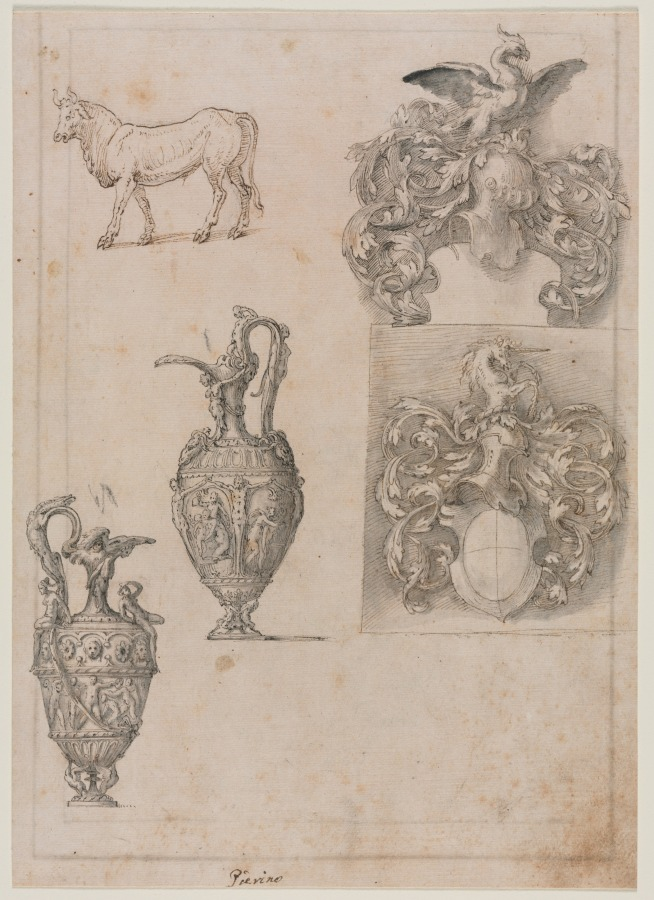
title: Design for Two Vases, Two Coats of Arms, and a Bull (recto) Several Line Borders (verso)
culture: Italy, 16th century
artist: Luzio Romano (Italian, active 1528–75)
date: mid 1500s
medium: pen and brown ink and brush and gray and brown wash over black chalk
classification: Drawing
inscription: lower center, in brown ink: Pierino ; VERSO OF SECONDARY SUPPORT, lower right, in graphite: A3103